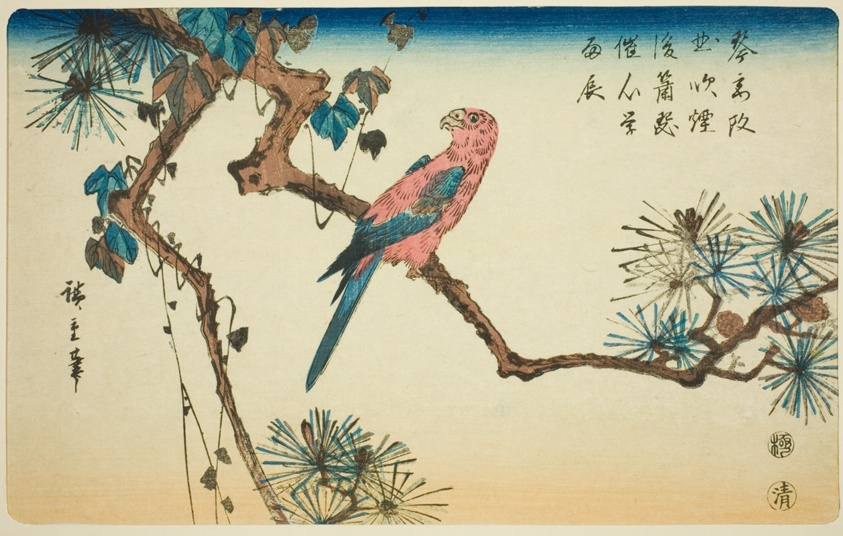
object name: Print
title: Macaw on pine branch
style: Japanese (culture or style)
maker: Utagawa Hiroshige 歌川 広重; Japanese, 1797-1858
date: c. 1840/44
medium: Color woodblock print; aiban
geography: Japan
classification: woodblock print; print; asian art